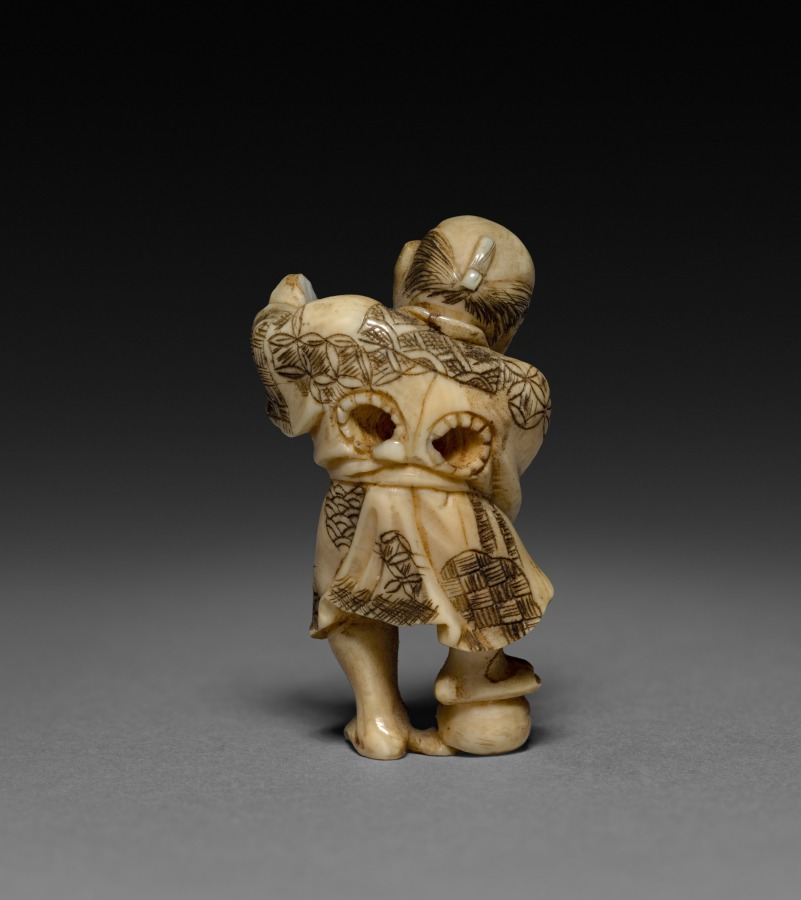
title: Netsuke of Man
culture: Japan, Meiji period (1868–1912)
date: 1900s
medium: ivory, pigment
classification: Ivory